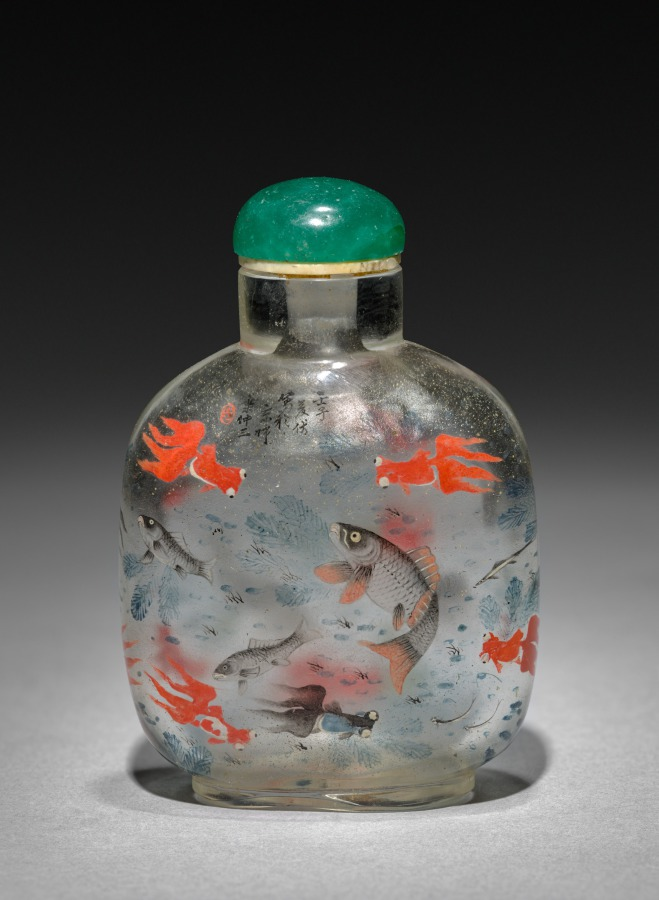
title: Snuff Bottle with Stopper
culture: China, Qing dynasty (1644–1911), Qianlong reign (1736–95)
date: 1736–95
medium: glass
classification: Glass